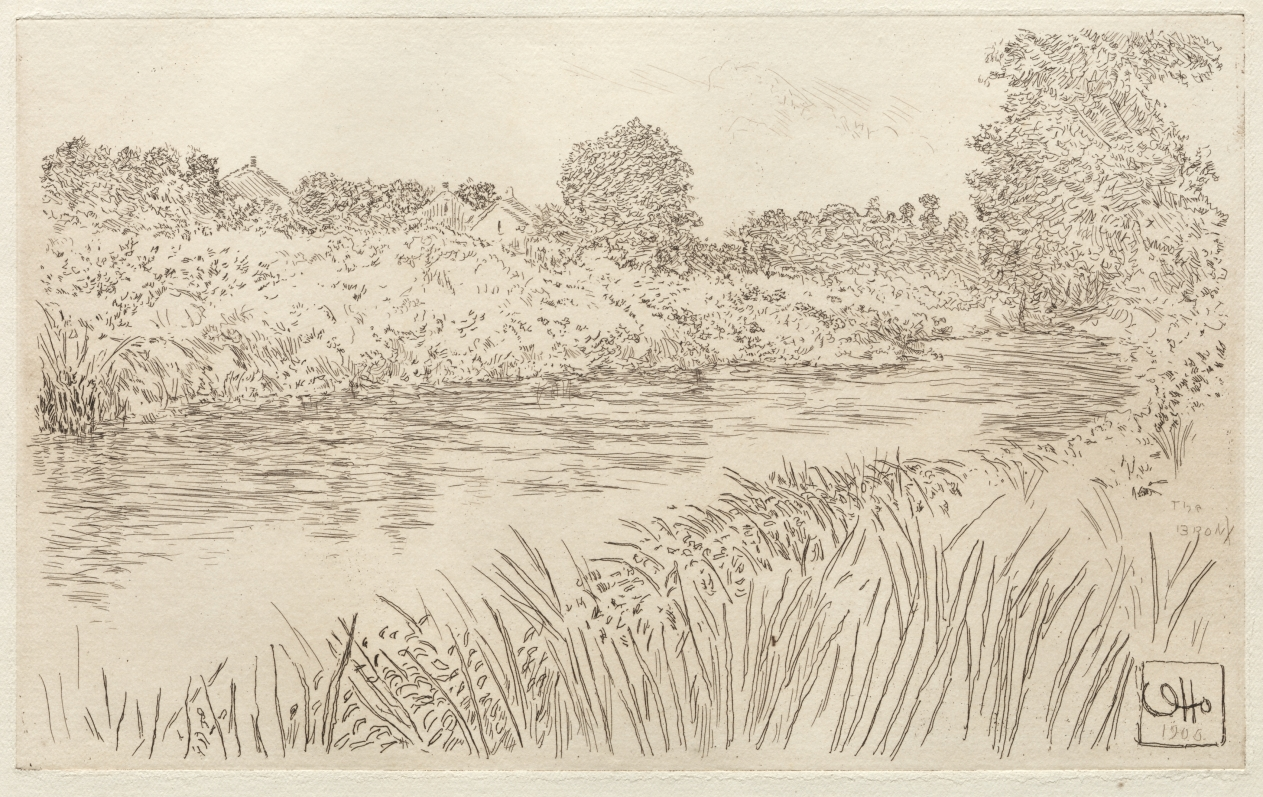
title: On the Bronx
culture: America, early 20th Century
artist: Otto H. Bacher (American, 1856–1909)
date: 1906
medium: etching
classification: Print